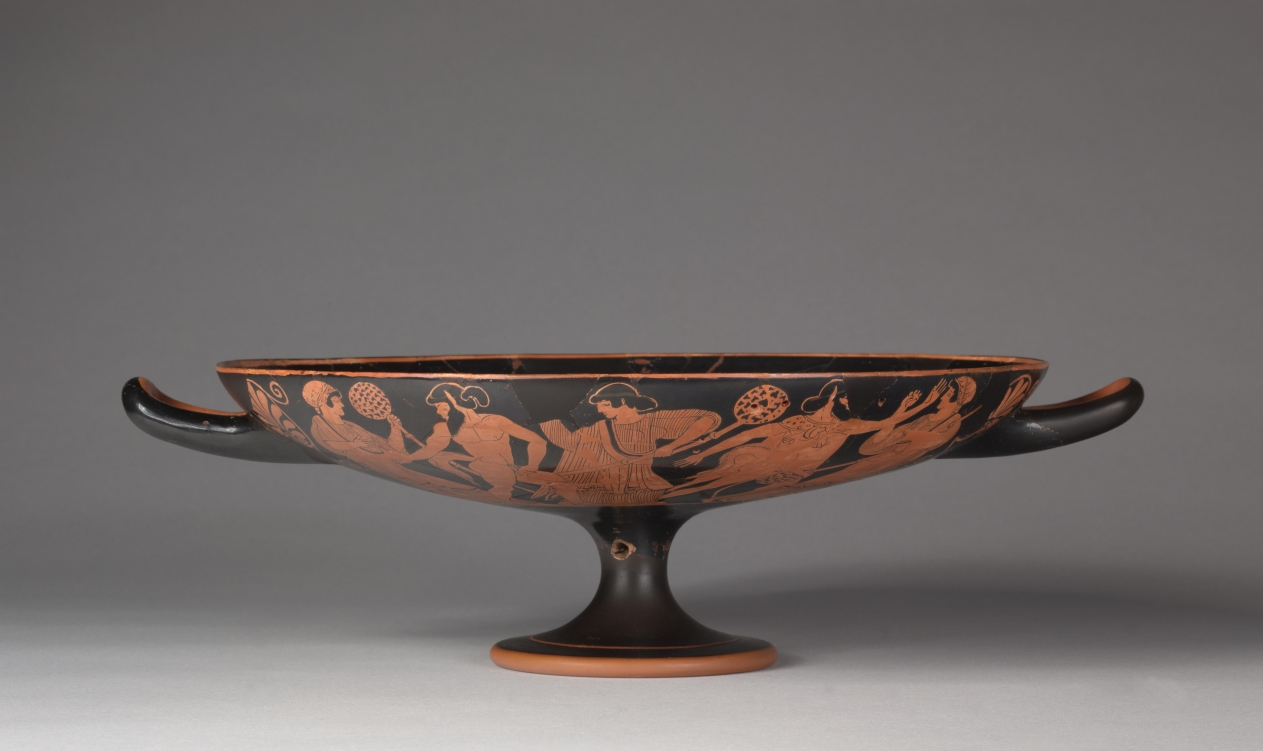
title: Red-Figure Kylix (Drinking Cup): Dionysos and Satyr (I); Satyrs and Maenads (A, B)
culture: Greece, Athens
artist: attributed to Douris (Greek, Attic, active c. 500–470 BCE)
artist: or Painter of London E 55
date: c. 480 BCE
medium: ceramic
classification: Ceramic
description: Reconstructed from 72 fragments, this cup has been repaired several times, indicating its enduring value to owners. Pairs of holes straddling cracks once held ancient wire or clamp repairs. Numerous incomplete holes may signify recent interventions. Early modern efforts to hide cracks and certain features of the satyrs that could have offended sensibilities of the time also masked the original artistry of its painting. So, for many years the cup languished in storage. Cleaning and reconstruction in 1952–53 revealed enough to allow attribution to a respected vase painter, Douris, reviving the cup’s reputation. More recently, a different attribution has been suggested, and a new conservation campaign replaced ancient parts from a different cup with modern reconstructions more like those lost.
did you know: In the tondo, a dancing satyr approaches the wine god Dionysos, who holds a kantharos and grapevine.